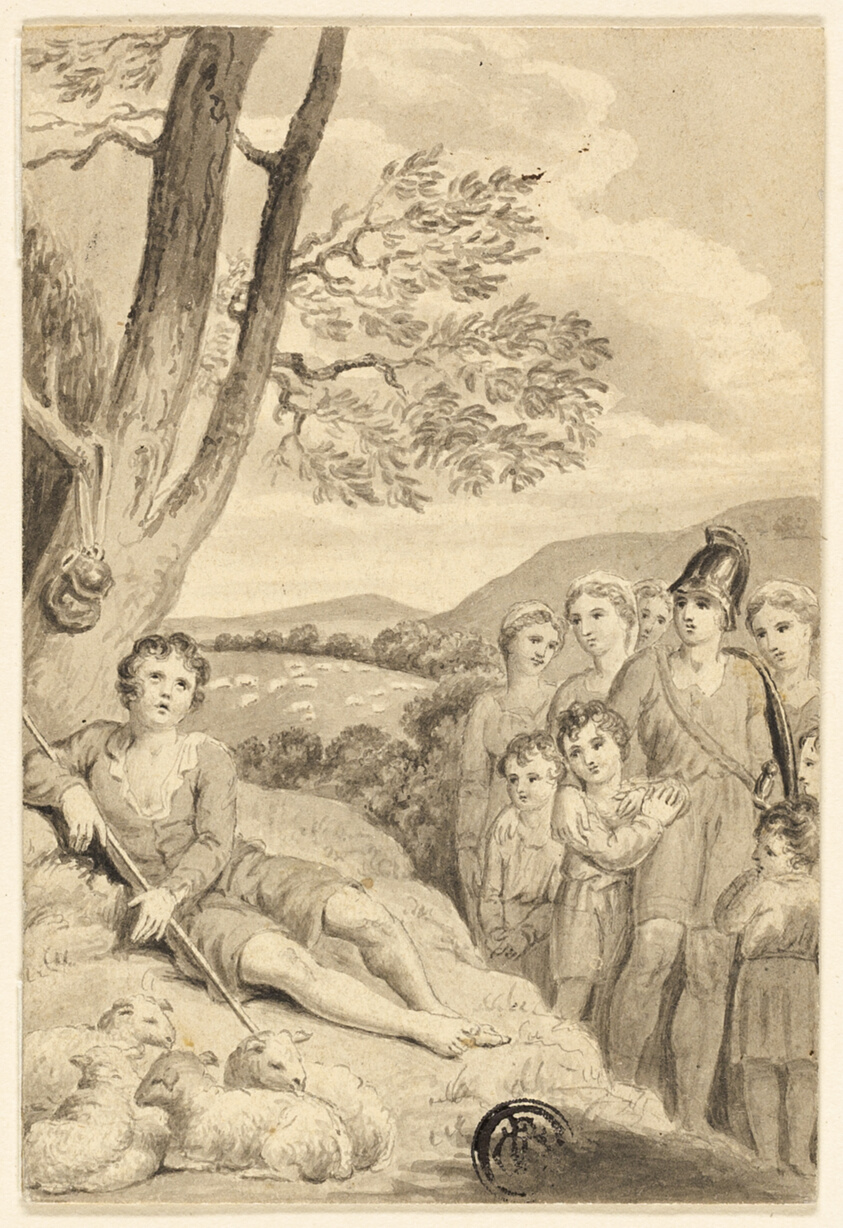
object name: Drawing and Watercolor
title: Shepherd Boy with Flock, Watched by Warrior, Women and Children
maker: Unknown Artist; European, n.d.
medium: Pen and black ink with brush and gray wash, on cream wove card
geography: England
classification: pen and ink drawings; drawings (visual works); prints and drawing